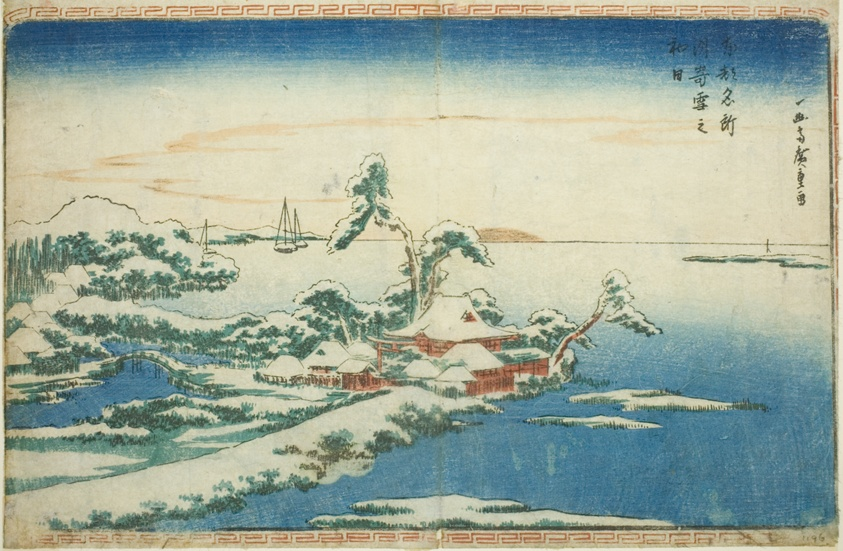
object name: Print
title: Snow on New Year's Day at Susaki (Susaki yuki no hatsuhi), from the series "Famous Views of the Eastern Capital (Toto Meisho)"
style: Japanese (culture or style)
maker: Utagawa Hiroshige 歌川 広重; Japanese, 1797-1858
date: c. 1831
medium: Color woodblock print; oban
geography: Japan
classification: woodblock print; print; asian art